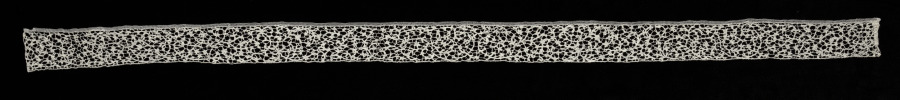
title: Lace Edging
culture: Italy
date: 1600s–1700s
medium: Bobbin lace (tape lace, similar to coralline point)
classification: Lace